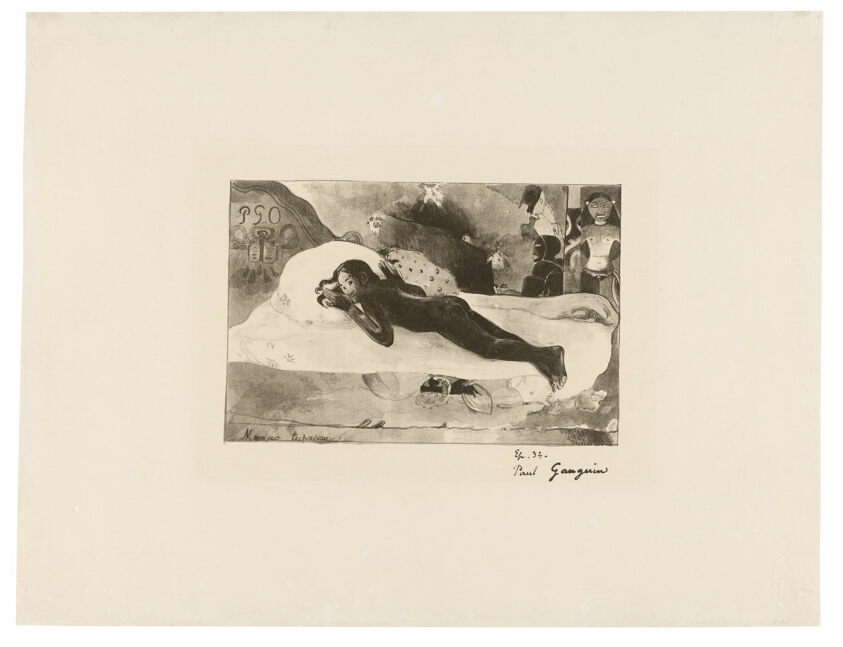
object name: Print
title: Manao tupapau (She Thinks of the Ghost or The Ghost Thinks of Her), from L’estampe originale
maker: Paul Gauguin (French, 1848-1903); published by L'Estampe originale (French, 1893-1895)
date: 1894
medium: Lithograph in black ink on ivory wove paper, discolored to light brown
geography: France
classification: lithograph; print; prints and drawing